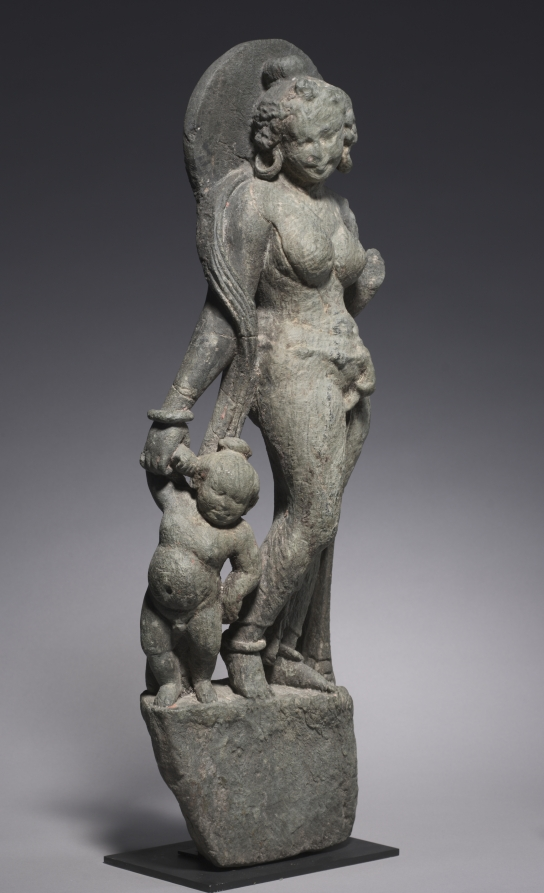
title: Mother Goddess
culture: Northwestern India, Rajasthan, Udaipur District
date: c. 600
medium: schist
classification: Sculpture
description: Sets of mother goddesses were installed in shrines near the entrance to Hindu temples. From one of the most naturalistic and charming sets, this mother attentively grasps the wrist of her toddler to gently guide him, while smiling lovingly and patiently at him. The simplicity of garments and ornament is characteristic of sculpture of the sixth century, and the naturalistic qualities of this work from northwestern India suggest connections with the Greco-Roman styles of Gandhara, in present-day Pakistan.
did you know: This sculpture was one of twelve that were brought to a modern temple known as the Tanesar (Thaneshvara) Mahadeva Temple.